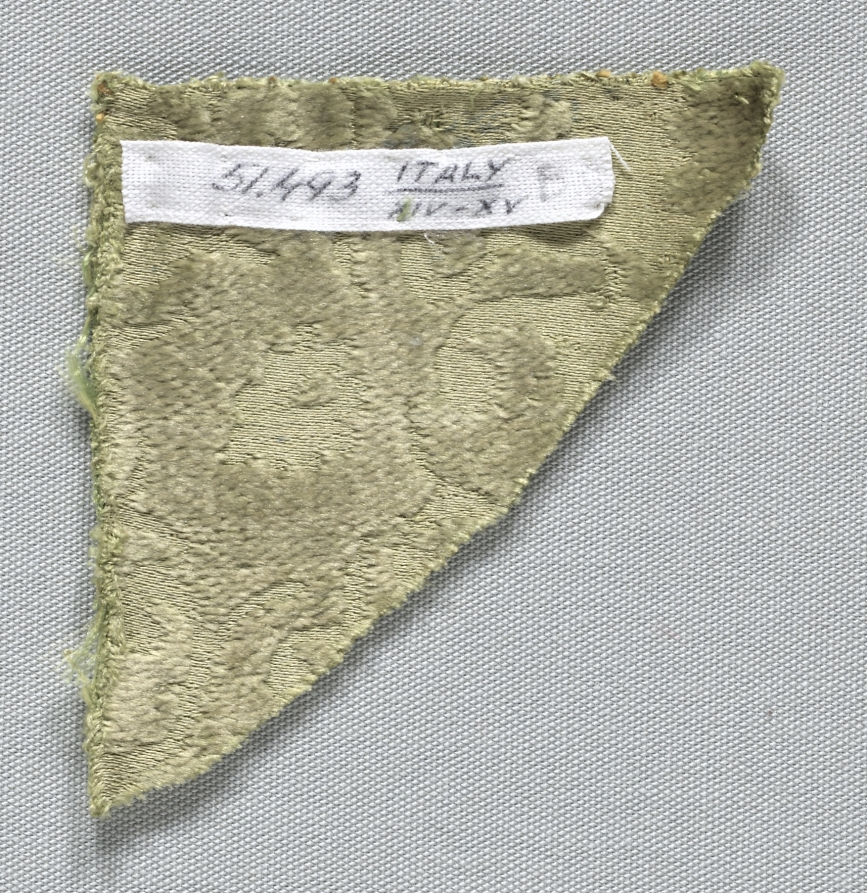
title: Fragment of a Chasuble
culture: Italy, beginning of the 15th century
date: 1400–1420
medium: velvet (cut and voided); silk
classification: Velvet